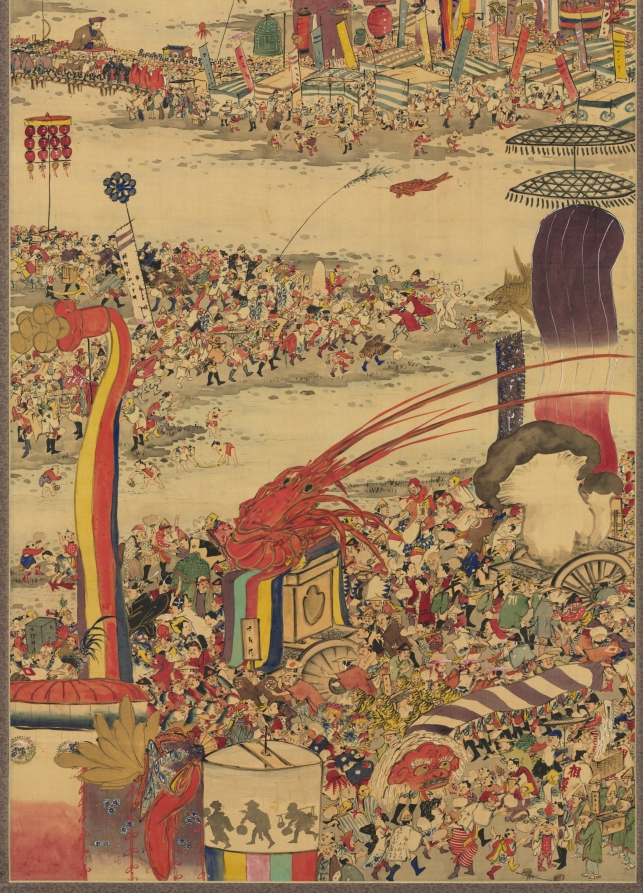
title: The Sand-Carrying Festival (Sunamochi Matsuri)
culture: Japan, Edo period (1615–1868)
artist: Sakai Basai (Japanese, dates unknown)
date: 1856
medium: hanging scroll; ink and color on silk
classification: Painting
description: Dredging waterways to preserve their function once required the cooperation of large numbers of people, seen at the top of this painting. Sand-carrying festivals were historically associated with religious rites or gathering alms to construct places of worship, and involved not only the labor of collecting sand from rivers but also parades and performances marking the event. Kyoto’s Kamo River has been dredged many times over the centuries, including in 1856, the year this image was made. Although the title at the upper right says Taihei Kakan, or “Peaceful, Beautiful View,” the painter’s delightful scene reminds his audience that at the best of times, peace may have little to do with quiet. Sakai Baisai was a student of literati painter Yamamoto Baiitsu (1783–1856). He was active until around 1879, when he relocated to Kobe to make his living as a design painter on porcelains destined for export.